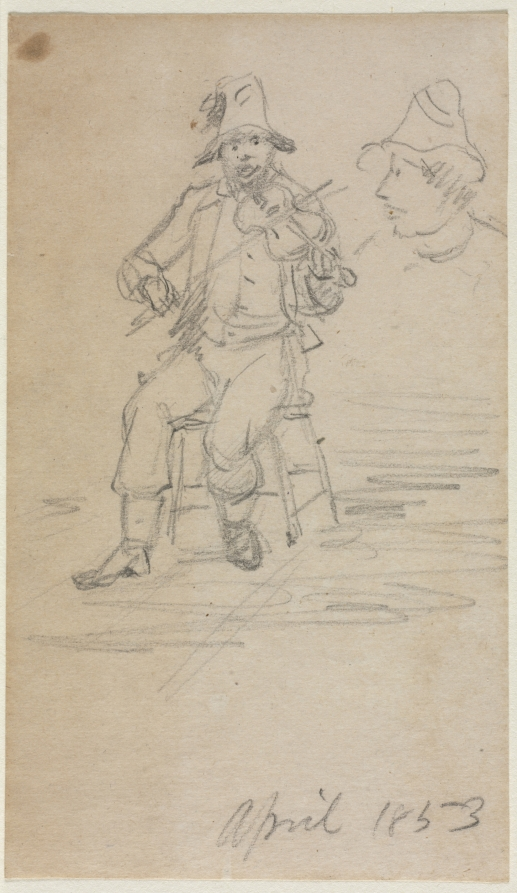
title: The Fiddling Beggar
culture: America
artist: William Sidney Mount (American, 1807–1868)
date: 1853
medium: graphite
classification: Drawing